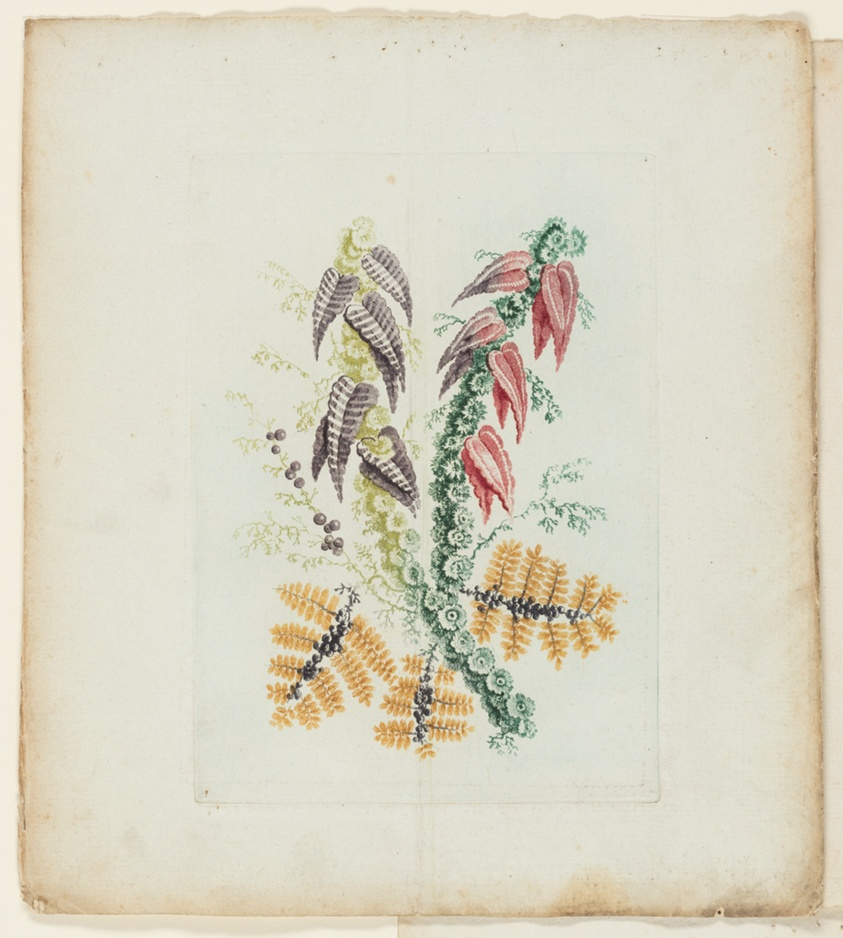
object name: Print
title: Plate, from New Suite of Notebooks of Ideal Flowers for Use by Draftsmen and Painters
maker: Anne Allen (English, active 1790s); after Jean-Baptiste Pillement (French, 1728-1808)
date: c. 1795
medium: Color etching with à la poupée inking on blue laid paper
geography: England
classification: etching; print; prints and drawing